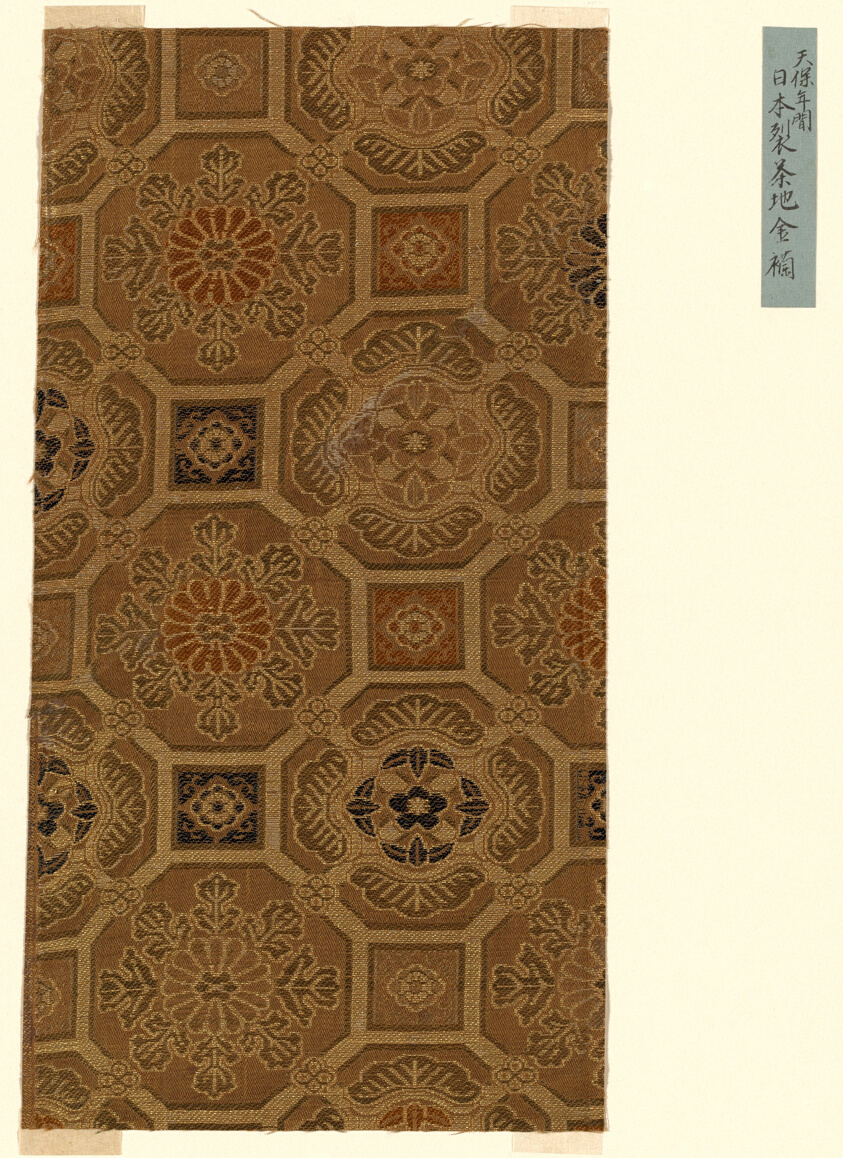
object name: Textile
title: Fragment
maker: Japan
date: late Edo period (1789–1868), 1800/25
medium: Plain compound twill, silk & gilt paper; 3 1/2 strips to m.m.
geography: Japan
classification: textile; weaving